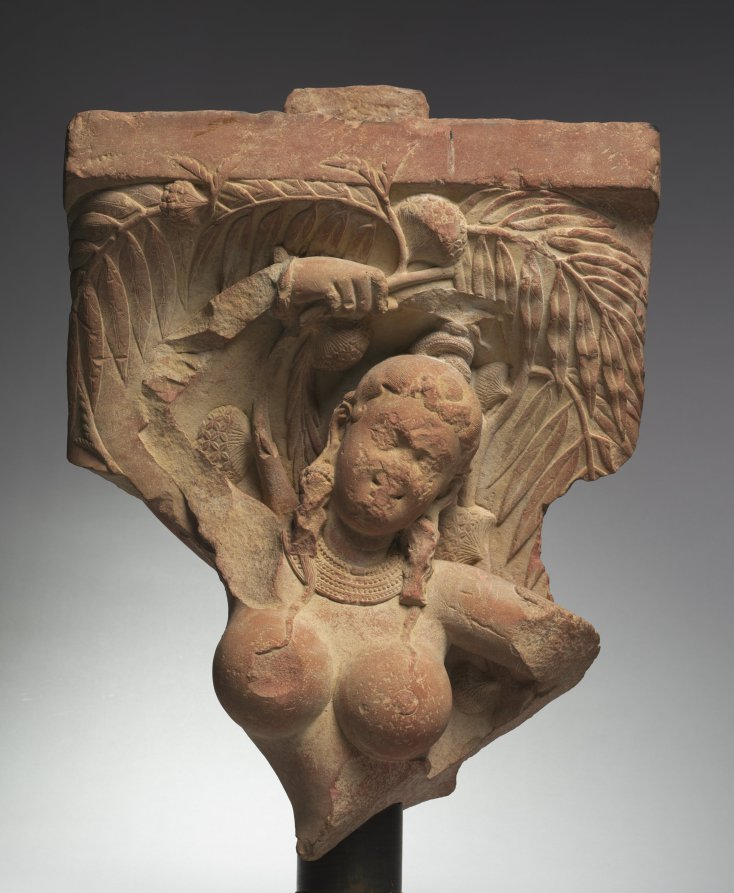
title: Gateway Bracket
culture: India, Mathura, Kushan period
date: 150–200 CE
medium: sandstone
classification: Sculpture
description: Gateways leading into a sacred area often had large horizontal architraves, the weight of which was supported by brackets carved with figures of voluptuous women grasping the branch of a tree. They embody the ideal form of the young mother, with breasts full of nourishing milk. As personifications of the sap that pervades living plants, they are auspicious markers of life and abundance. These attractive figures, who embody the purifying water essential for life, symbolically cleanse visitors as they enter the sacred space. On both sides of this large bracket they grasp the branch of an ashoka tree, which has clusters of flowers that are bright red in nature.